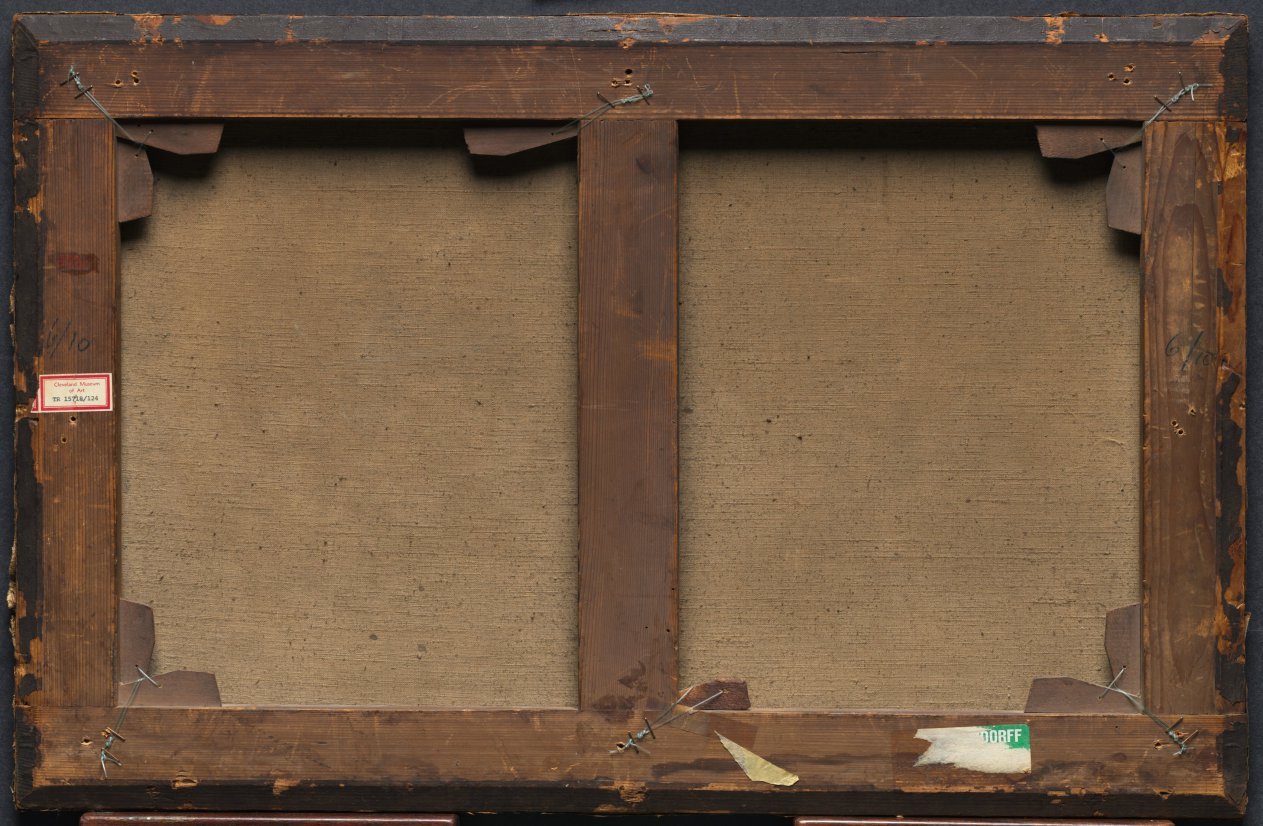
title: View of Saint-Cloud, Near the Seine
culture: France, 19th century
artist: Alexandre Pau de St. Martin (French)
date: 1809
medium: oil on fabric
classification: Painting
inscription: Signed lower right: AP St. Martin 1809 [AP in monogram]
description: This painting depicts the park associated with the royal Chateau of Saint-Cloud, famous for its terraced gardens overlooking the River Seine. At the left of the scene, one of the park's gazebos is set among the trees. This view from Saint-Cloud over the river was a traditional and popular one. Very little is known about the life of Pau de Saint-Martin. Most of his surviving works are landscapes, the titles of which indicate he painted in the Forest of Fontainebleau, southeast of Paris, as early as 1795. Perhaps the artist is most important as the teacher of his nephew Theodore Rousseau (1812–1867), who became the founder of the Barbizon school of landscape painting.